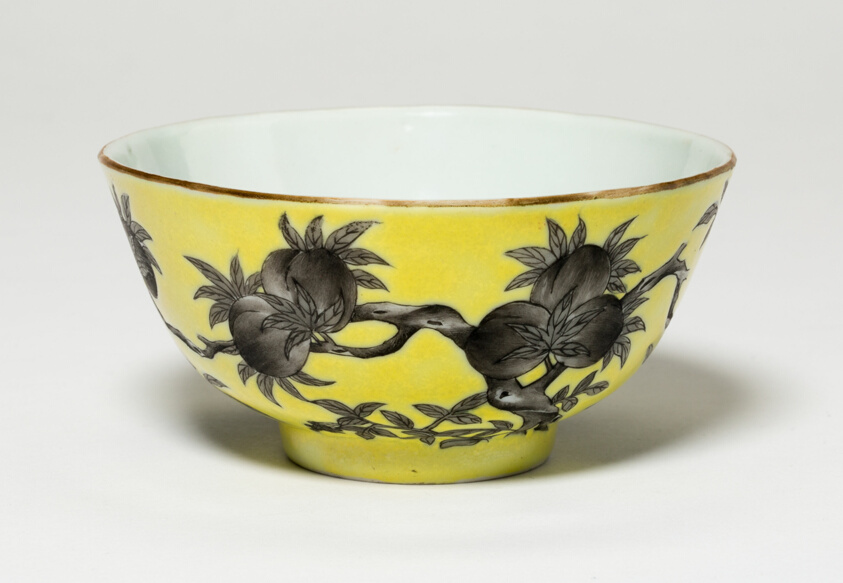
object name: Vessel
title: Cup with Peaches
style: Chinese (culture or style)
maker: China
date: Qing dynasty (1644–1911), Guangxu period (1875–1908), c. 1894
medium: Porcelain painted in overglaze enamels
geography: China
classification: drinking vessel; ceramics; vessel